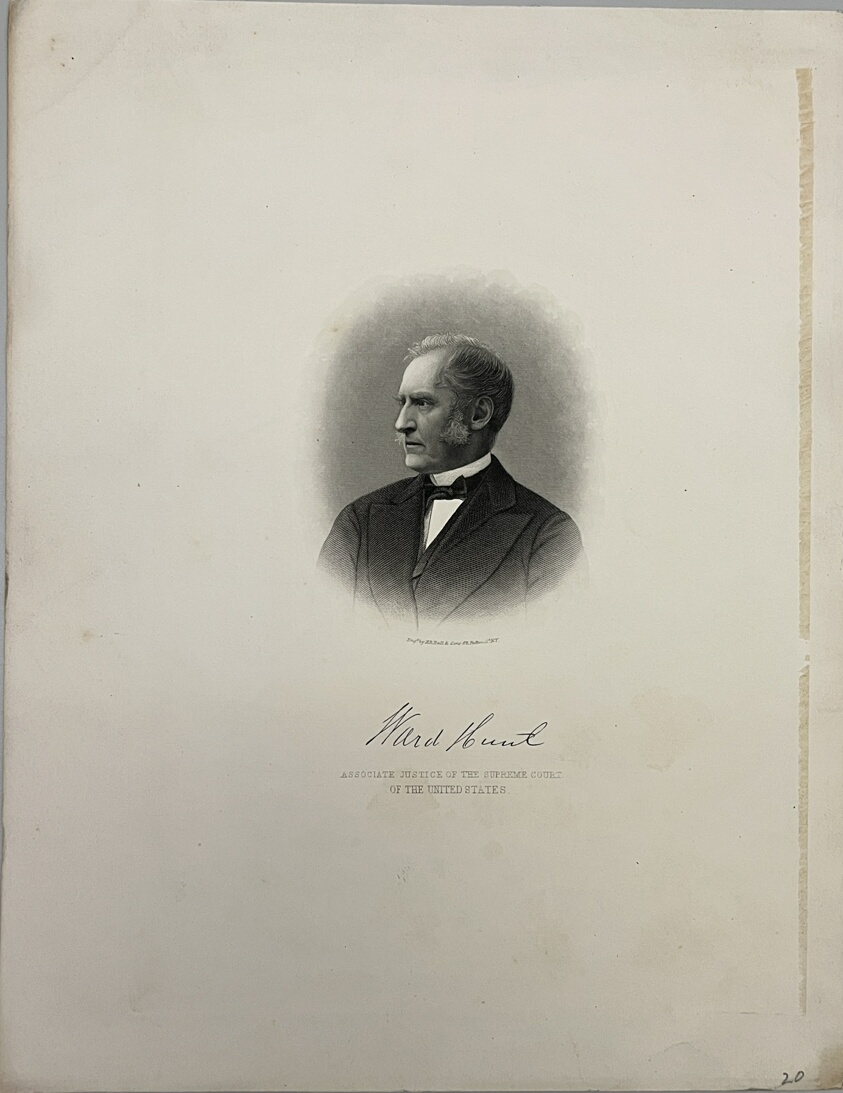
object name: Print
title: Ward Hunt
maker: Henry Bryan Hall (American, 1808-1884)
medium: Steel engraving on paper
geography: United States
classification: reproduction; print; prints and drawing